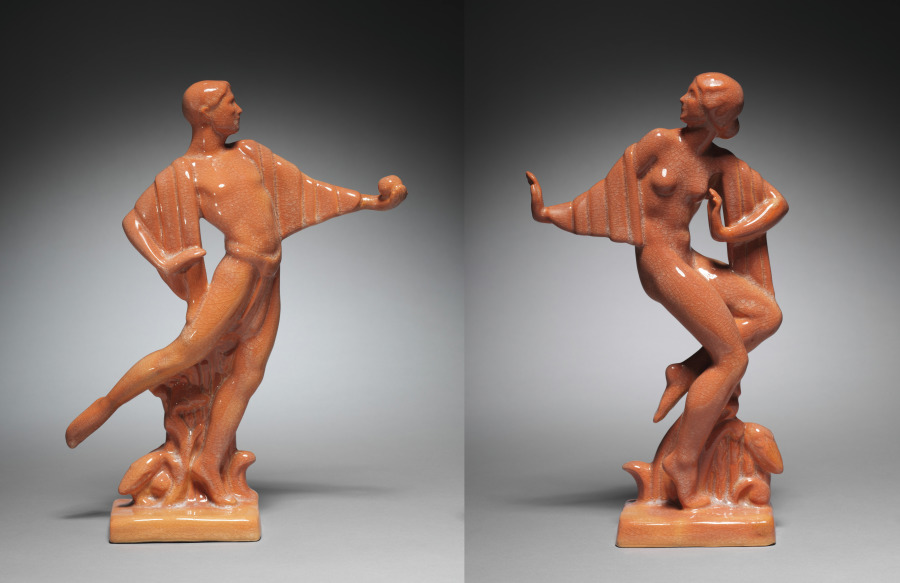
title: Adam and Eve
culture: America, Ohio, Cleveland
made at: Cowan Pottery Studio (America, Rocky River, Ohio, 1920–1931)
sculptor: R. Guy Cowan (American, 1884–1957)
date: 1928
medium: glazed ceramic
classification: Ceramic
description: In a remarkable departure from tradition, this ceramic sculpture depicts Adam tempting Eve with the forbidden fruit from the Tree of Knowledge. According to the Bible, it was Eve who offered Adam the apple which led to mankind's downfall, ushering sin and death into the world. Adam's loincloth indicates that he has become ashamed of his nudity, a sign of his fall from grace. This startling role reversal reflects Cowan's belief that men are more prone to moral temptation than women. In addition to its innovative iconography, the sculpture's rich color and elegant, rhythmic forms establish it as Cowan's finest work and a masterpiece of the American Art Deco aesthetic. Born to a family of potters in East Liverpool, Ohio, Cowan directed the Cowan Pottery studios in Lakewood (1912-17) and Rocky River (1919-32), Ohio. Cowan Pottery was among the foremost producers of American Art Deco pottery and ceramic sculpture. Cowan recruited many talented artists to work in his studios, including Thelma Frazier Winter, Edward Winter, Walter Sinz, Waylande Gregory, and Viktor Schreckengost.